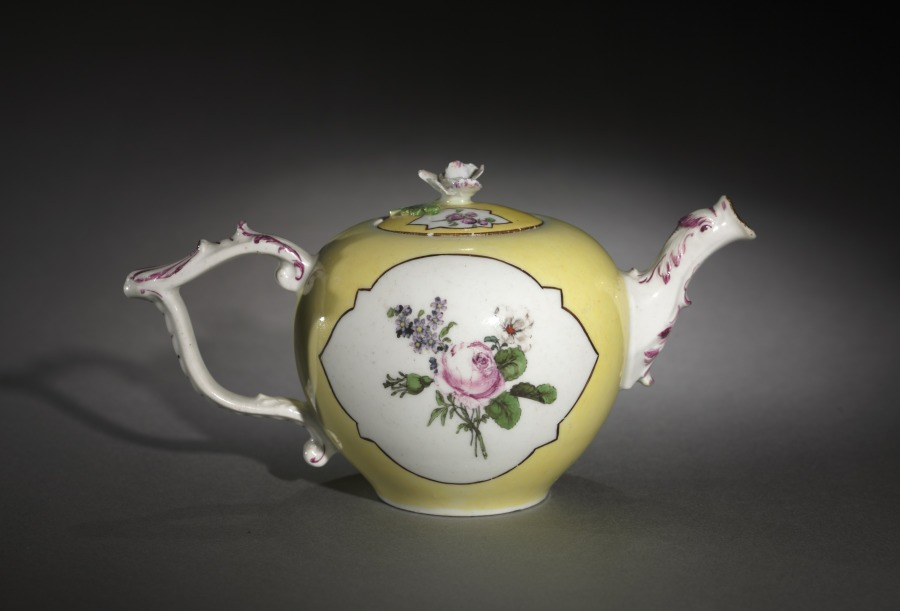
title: Teapot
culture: Germany, Meissen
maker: Meissen Porcelain Factory (German, est. c. 1710)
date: c. 1750–70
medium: porcelain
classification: Ceramic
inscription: Mark on the bottom that looks like two swords crossing, with a small V intersecting.